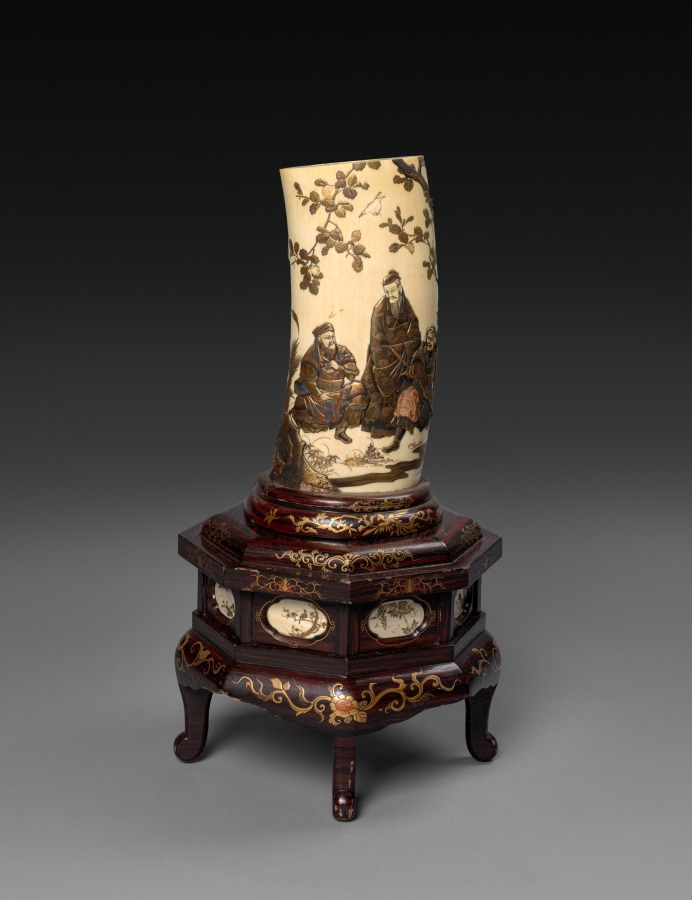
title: Ivory Tusk Vase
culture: Japan, Meiji period (1868–1912)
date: late 1800s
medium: carved ivory, pigment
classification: Ivory